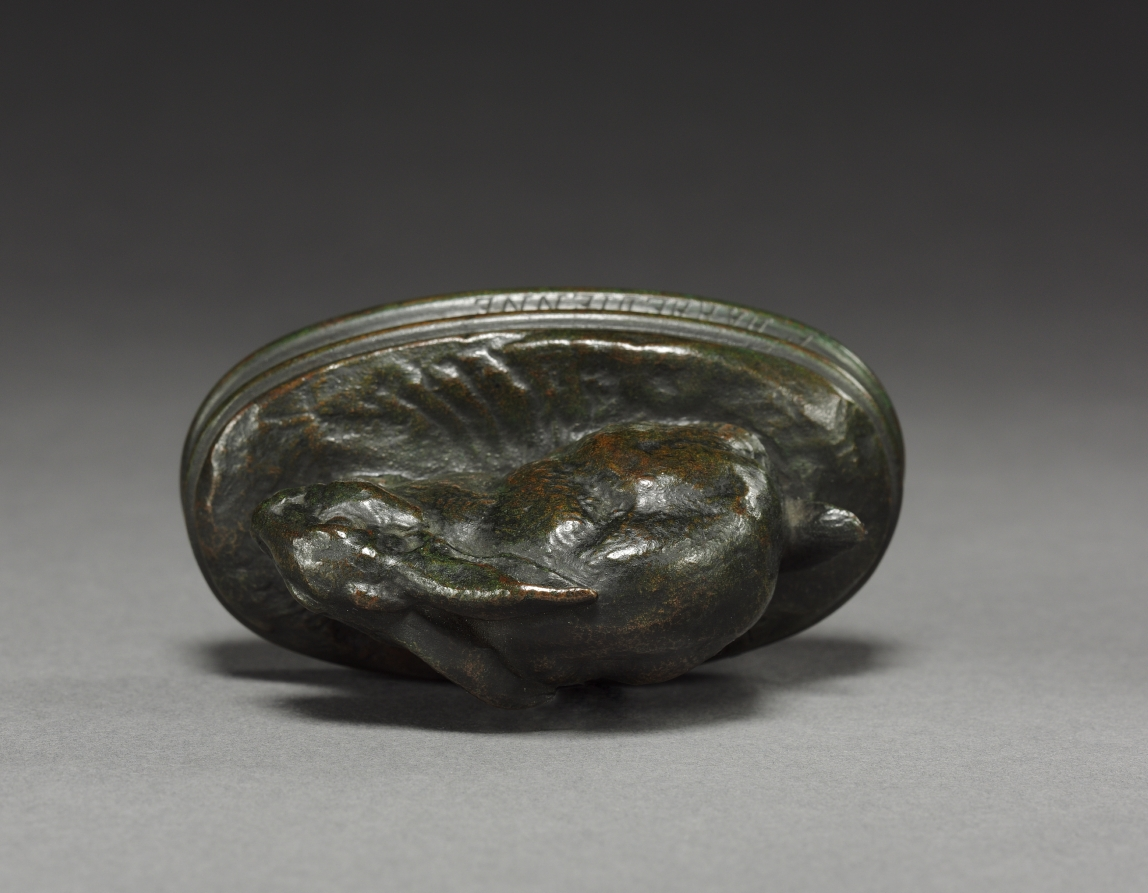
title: Hare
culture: France, 19th century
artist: Antoine-Louis Barye (French, 1796–1875)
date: c. 1830 – 1875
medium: bronze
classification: Sculpture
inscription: Signed on base top rear: "Barye"